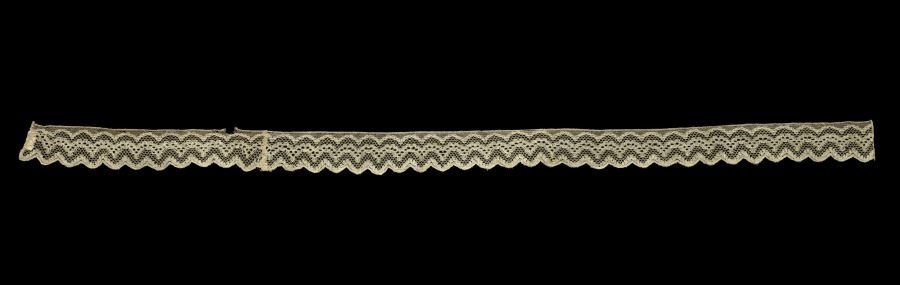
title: Lace Edging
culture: England, Buckinghamshire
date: 1800s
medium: Bobbin lace outlined with silk cordonnet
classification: Lace